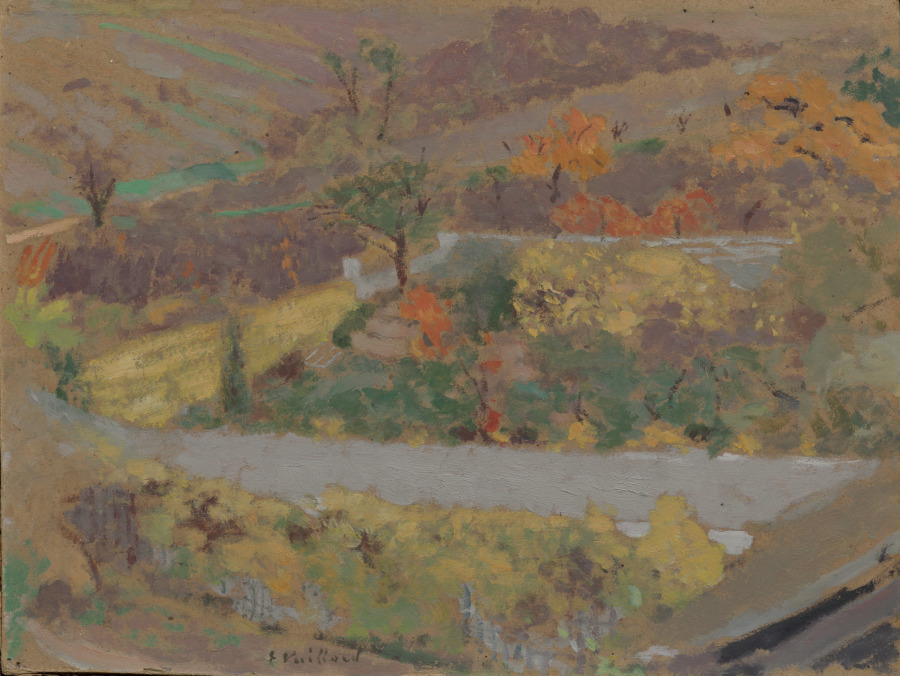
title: Orchard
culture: France, 19th century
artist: Édouard Vuillard (French, 1868–1940)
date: 1897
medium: oil on board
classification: Painting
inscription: signed lower center: E Vuillard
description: The organic strokes that comprise Vuillard’s trees contrast with the linear divisions of agricultural land. The imagery is reminiscent of a passage written by the artist’s muse, Misia Natanson: “Solemn and dreamy, Vuillard led me along the river, past high silver birch trees. . . . He slowly moved through the yellowed grass. . . . Our silhouettes were just shadows against a pale sky.”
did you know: Fellow artist Maurice Denis noted in his journal that Vuillard paid little attention to color theory. In this painting, Vuillard used several colors that are next to each other on the color wheel such as orange, yellow, and green rather than pairing complementary colors.